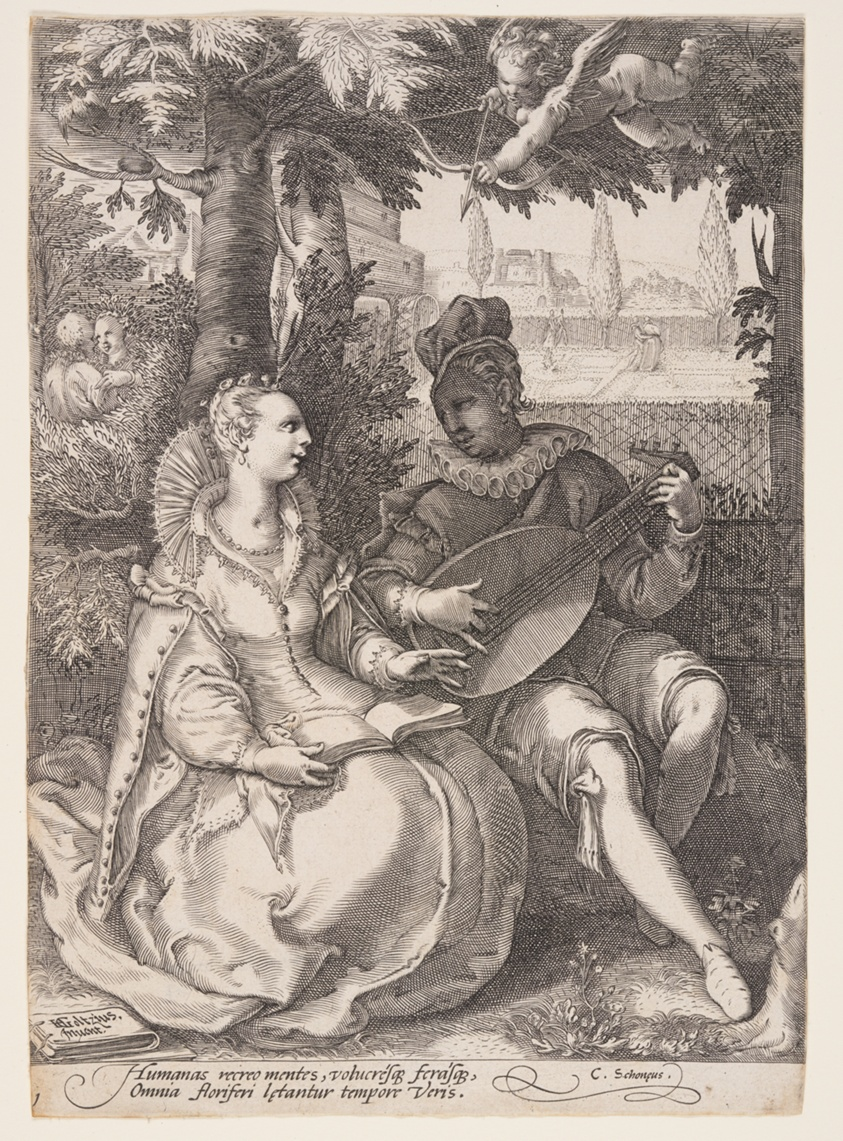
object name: Print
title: Spring (Music-Making Couple), from The Four Seasons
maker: Attributed to Jan Saenredam (Dutch, 1565–1607); after Hendrick Goltzius (Dutch, 1558–1617)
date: c. 1595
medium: Engraving on laid paper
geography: Netherlands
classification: print; engraving; paper; prints and drawing